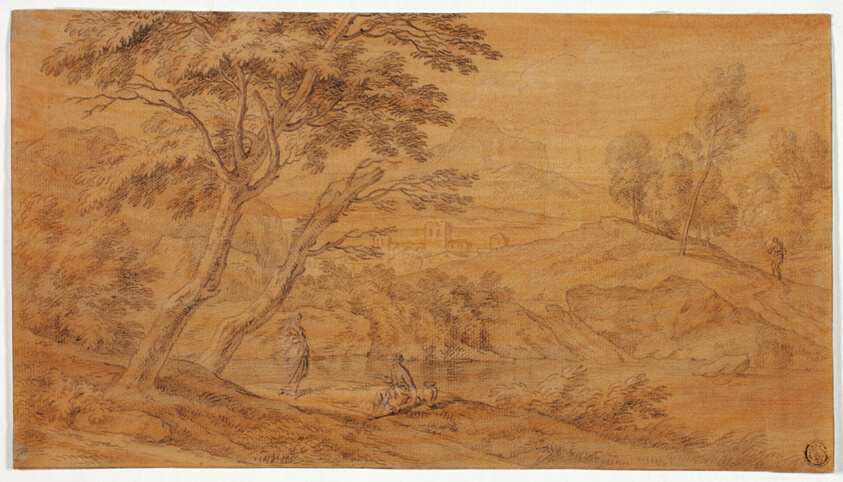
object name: Drawing and Watercolor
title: Landscape with Figures by a Stream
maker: Johannes Glauber or school of; Dutch, 1646-c. 1726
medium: Black chalk on orange tinted laid paper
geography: Holland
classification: graphite; drawings (visual works); prints and drawing